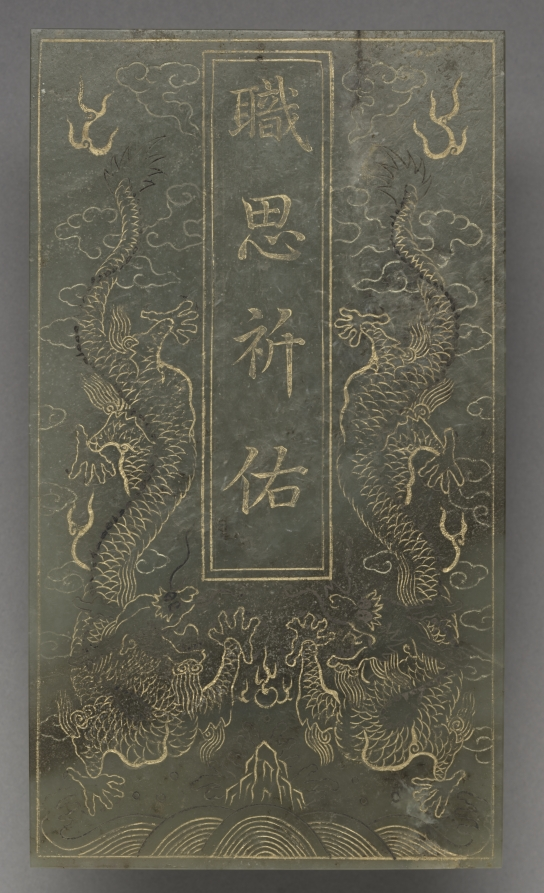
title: Tablet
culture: China, Qing dynasty (1644–1911), Qianlong reign (1736–95)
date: 1778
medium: jade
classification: Jade